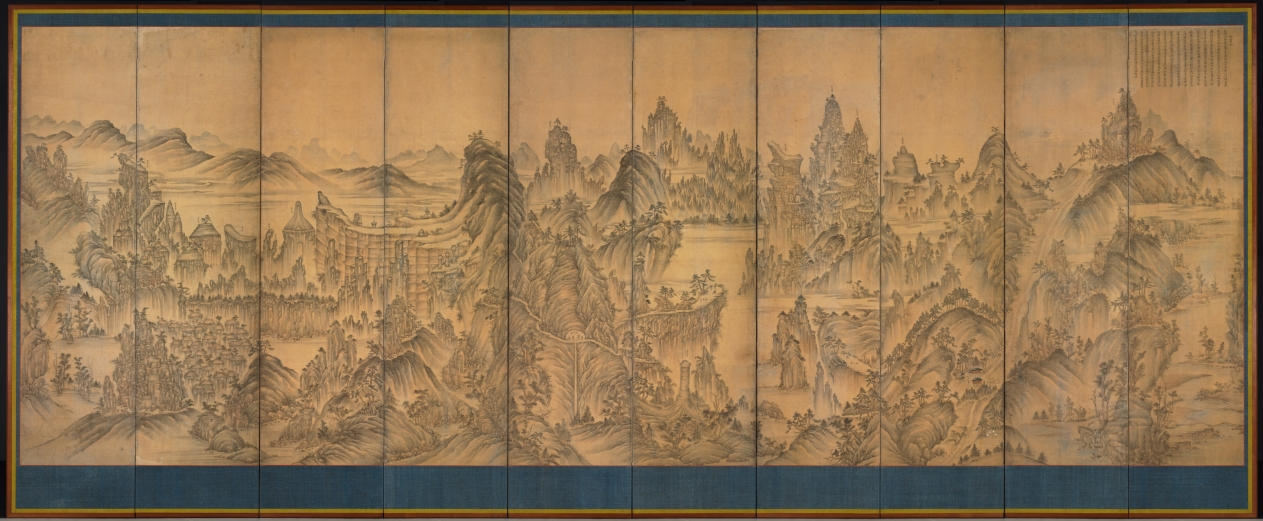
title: Seven Jeweled Mountain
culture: Korea, Joseon dynasty (1392–1910)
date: late 1800s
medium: ten-panel screen; ink and color on silk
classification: Painting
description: With a bird’s-eye view, this ten-panel folding screen portrays the famous Seven Jeweled Mountain 칠보산 in North Korea. Ancient volcanic eruptions shaped the mountain’s unique and awe-inspiring terrain such as phallic-shaped pillars (panel #5, from the right); a large flat-topped, steep-sided cliff (panels #7 and #8), and a rugged mountain composed of metamorphic and igneous rocks (panels #9 and #10). The tradition of landscape painting that details actual natural sites and captures their topographic features in Korea began in the 1700s and continued onward. While such natural wonders were beloved as popular destinations for tourism and pilgrimage, after the Korean War (1950–53), these sites in North Korea are no longer accessible to the outside world. This folding screen detailing the mountain’s distinctive topography feeds our imagination and longing for such an unattainable place.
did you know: Featuring a spectacular panoramic view and topographical details, this ten-panel folding screen is an excellent 19th-century version of the Korean “true-view” landscape painting tradition.